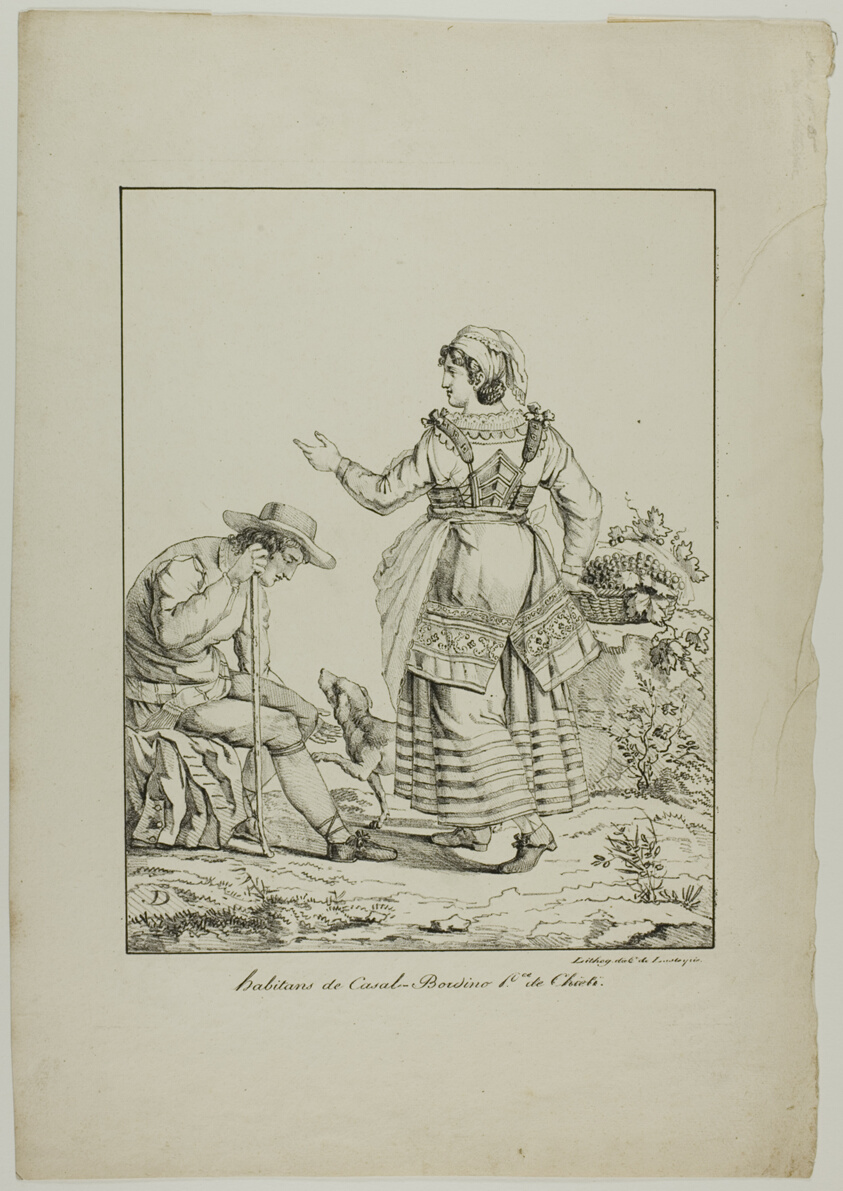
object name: Print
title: Natives of Casal-Bordino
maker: Monogrammist D (possibly French, 18th-19th century)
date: 1817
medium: Lithograph in black on ivory wove paper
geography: France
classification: lithograph; print; prints and drawing